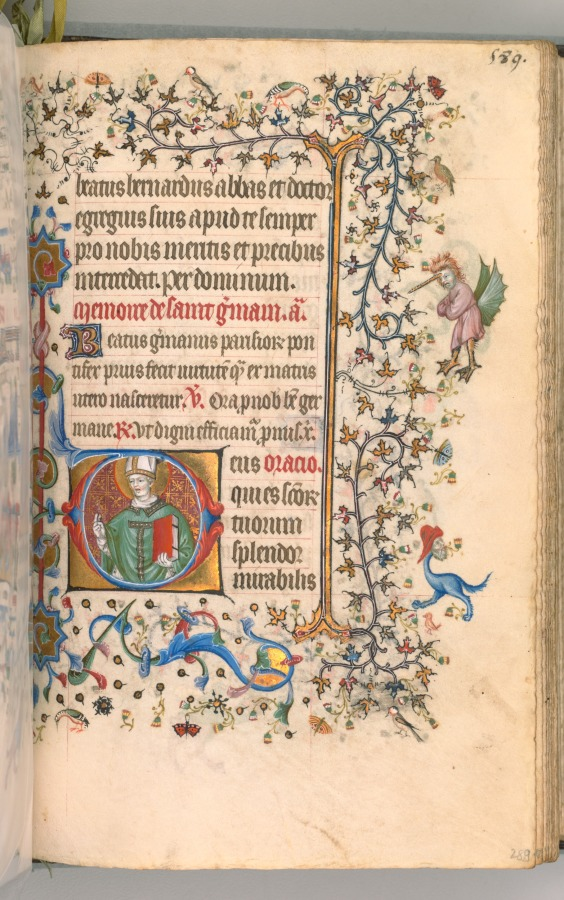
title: Hours of Charles the Noble, King of Navarre (1361-1425): fol. 289r, St. Germain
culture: France, Paris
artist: Master of the Brussels Initials and Associates (French)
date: c. 1405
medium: ink, tempera, and gold on vellum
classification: Bound Volume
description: This precious volume was obviously highly prized by its owner, the French-born King of Navarre, who had his coat of arms painted on no less than twenty folios. Rather than directly commissioning this manuscript from a specific workshop, it seems that Charles the Noble acquired his book of hours -- perhaps ready-made for the luxury market -- while on a trip to Paris in 1404-05. A collaborative effort, six painting styles are evidenced within the pages of this codex, those of two Italians, two Frenchmen, and two Netherlanders. The painter who was responsible for the planning and decoration of the book, and who produced seventeen of the large miniatures, was a Bolognese artist known as the Master of the Brussels Initials. His principal assistant, responsible for most of the borders, was a Florentine who signed his name "Zecho" da Firenze on folio 208 verso.